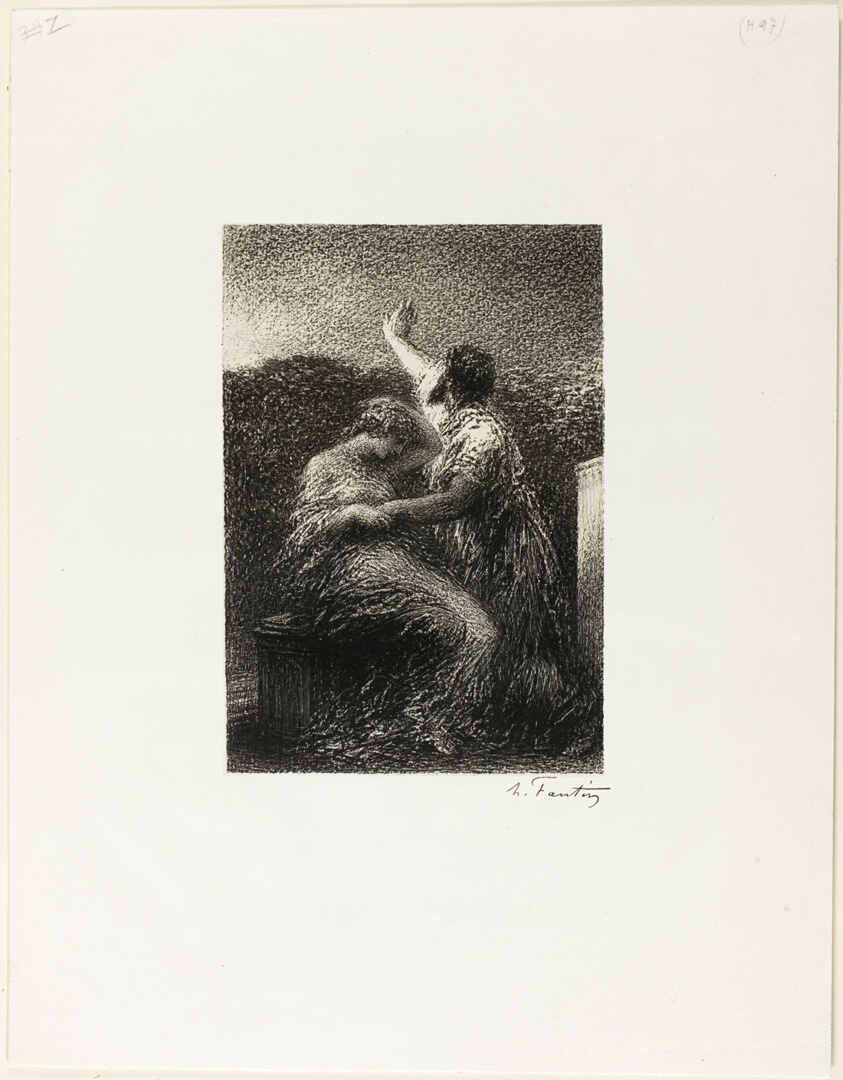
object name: Print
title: The Magus Balthasar and Fatima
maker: Henri Fantin-Latour (French, 1836-1904)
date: 1891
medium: Lithograph in black on off-white China paper laid down on white wove paper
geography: France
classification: lithograph; print; prints and drawing